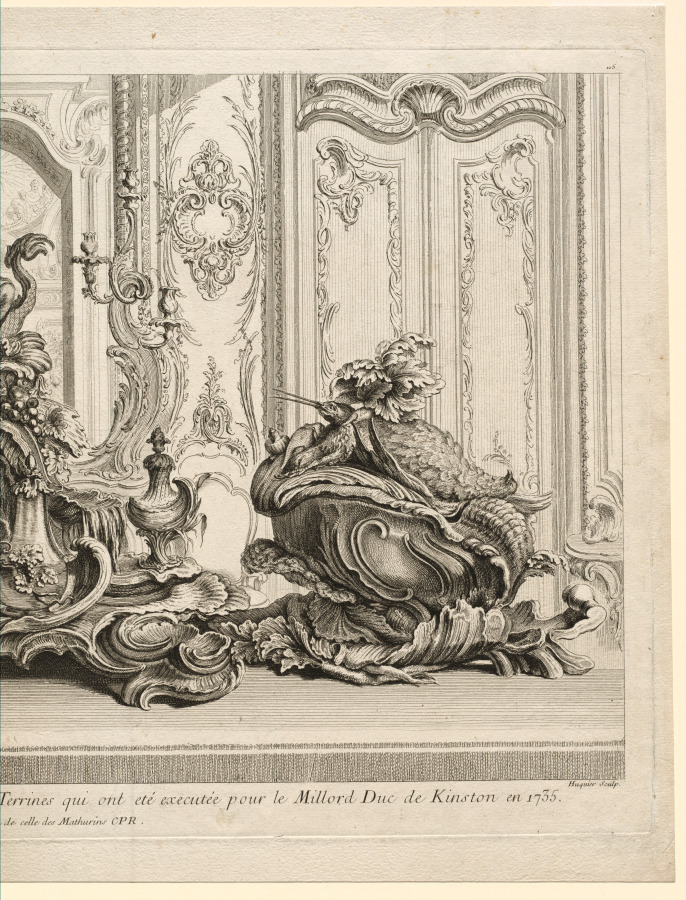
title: Silver Sculptural Project for a Large Centerpiece and Two Tureens Which Have Been Executed for His Lordship the Duke of Kingston, plate 115 from Works of Juste-Aurèle Meissonier (Oeuvre de Juste-Aurèle Meissonier)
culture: France, 18th century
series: Works of Juste-Aurele Meissonier (Oeuvre de Juste- AurPle Meissonier), plate 115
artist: Gabriel Huquier (French, 1695–1772)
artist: after Juste-Aurèle Meissonnier (French, 1695–1750)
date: c. 1735–37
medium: etching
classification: Print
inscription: J. A. Meissonier inv./Huquier Sculp.; Inscriptions: Below title: A Paris chJs Huquier rue St Jacque au coin de celle des Matburins CPR.; upper right: 115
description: In addition to documenting an important commission, this etching endorses the designer’s stylish products by associating them with social status. Meissonnier’s name appears below the image on the left, and the large inscription identifies the illustrious patron, the Duke of Kingston, known well in Parisian society. Perhaps functioning similarly to a magazine advertisement today, the fashionable rococo-style scene invites viewers to imagine themselves as the owners of the luxurious tableware. Contrary to the inscription at the bottom of the sheet, the etching actually shows two views of only one of the tureens made for the Duke of Kingston (the tureen displayed nearby). The tureen not depicted features a crab instead of a lobster on the lid. The grand sculptural centerpiece was probably never produced.